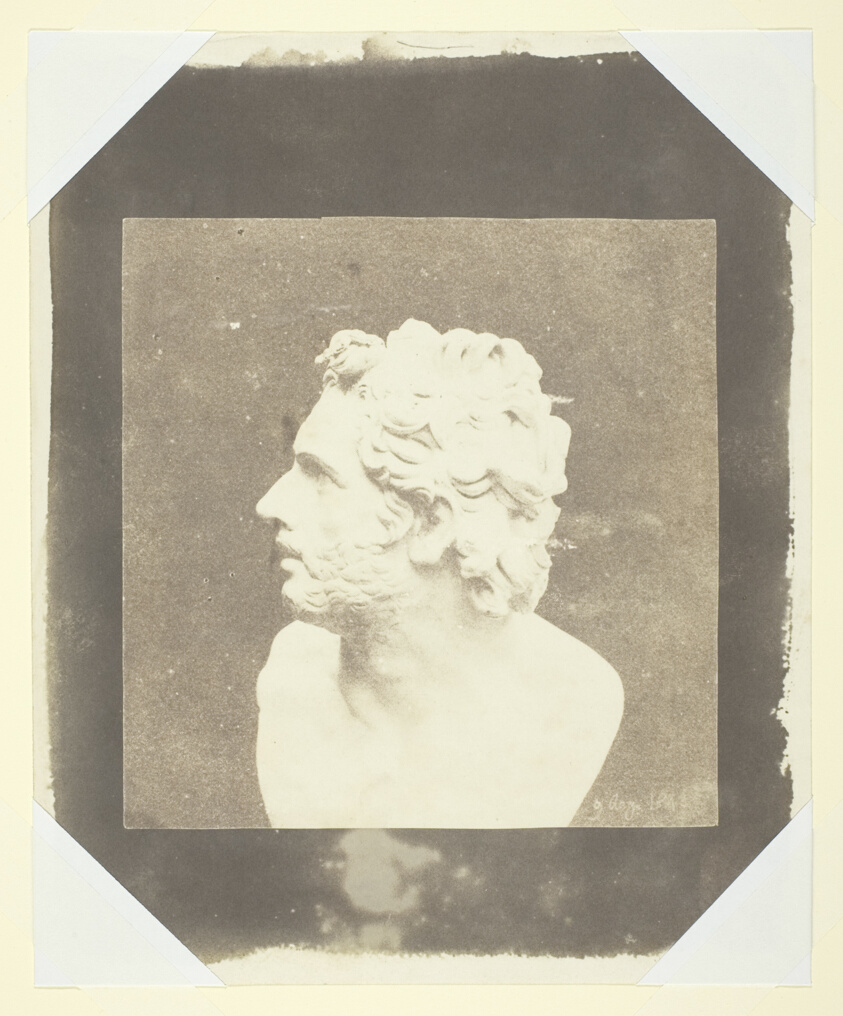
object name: Photograph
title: Bust of Patroclus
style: 19th century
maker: William Henry Fox Talbot (English, 1800–1877)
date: August 9, 1843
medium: Salted paper print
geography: England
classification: salted paper print; photographic process; photography; photograph